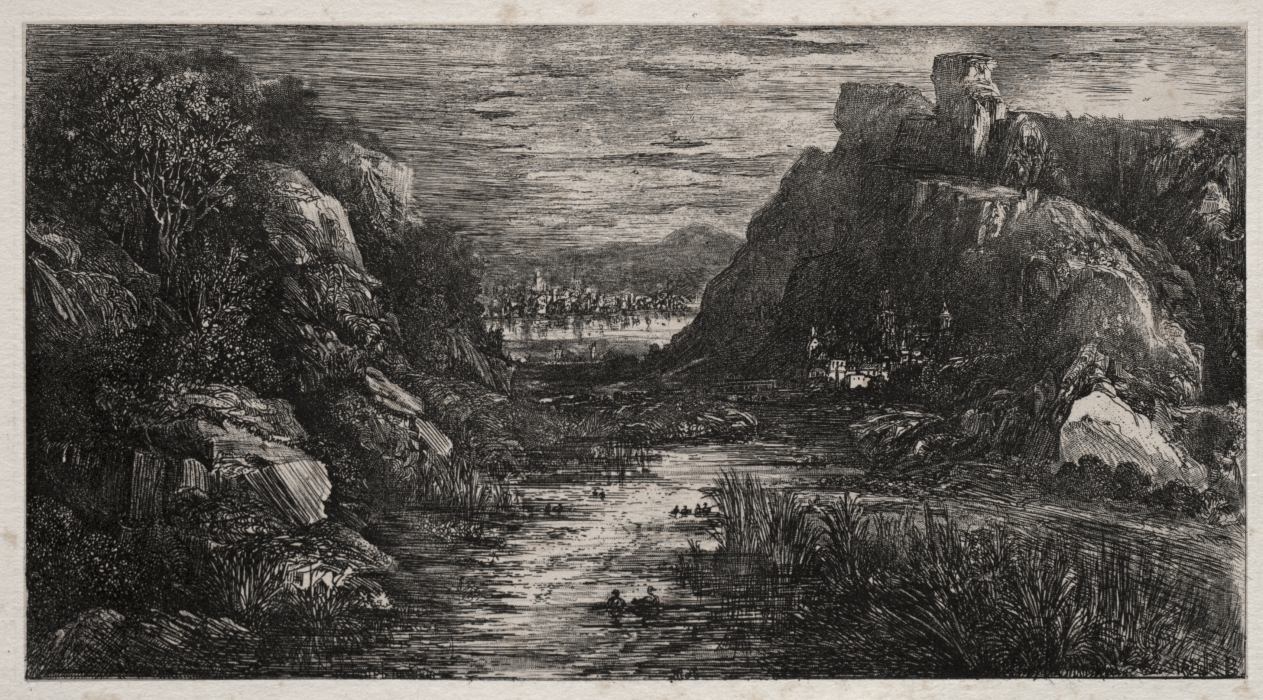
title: The Distant City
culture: France, 19th century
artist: Rodolphe Bresdin (French, 1822–1885)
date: 1868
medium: lithograph and roulette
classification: Print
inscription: lower right corner, in stone: 1868 RB